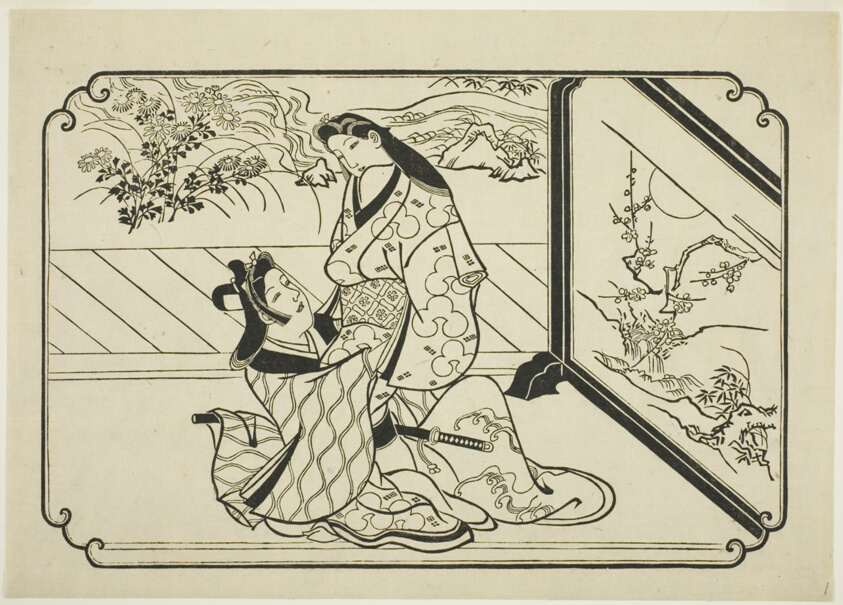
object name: Print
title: Behind the Screen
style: Japanese (culture or style)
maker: Hishikawa Moronobu (Japanese, (?)-1694)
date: c. 1673/81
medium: Woodblock print; sumizuri-e, oban yoko-e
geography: Japan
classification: woodblock print; print; asian art; woodblock